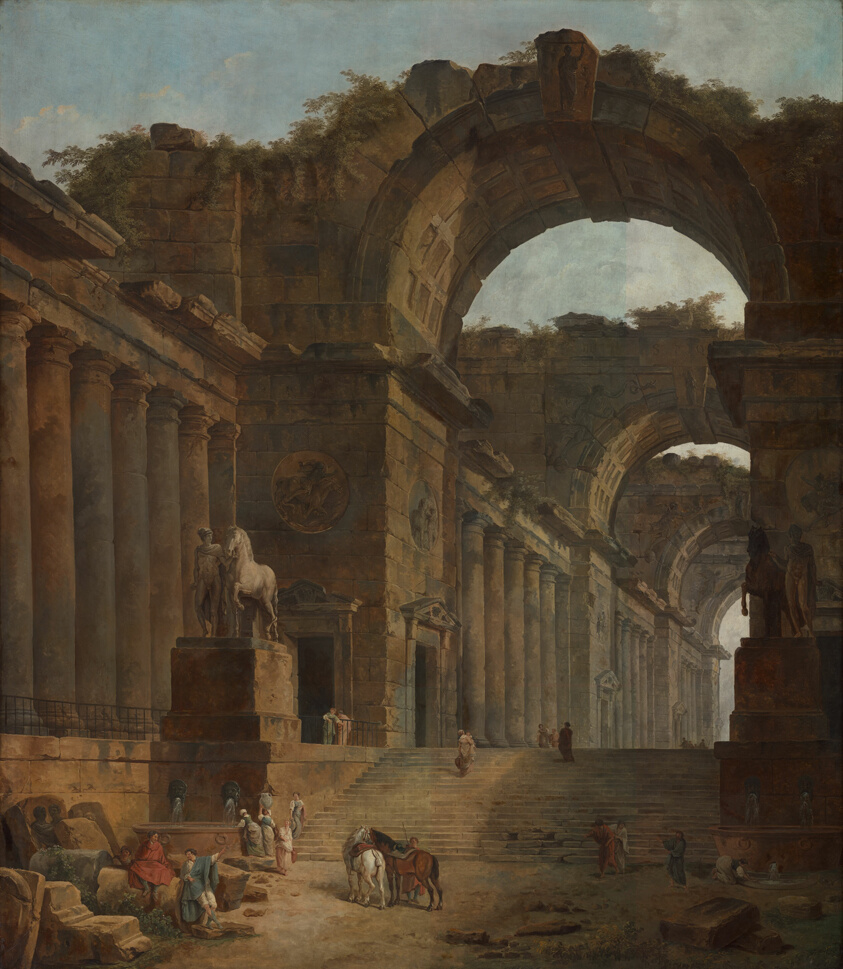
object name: Painting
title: The Fountains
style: Neoclassicism, 18th Century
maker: Hubert Robert (French, 1733-1808)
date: 1787/88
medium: Oil on canvas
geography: France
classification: oil on canvas; architecture; french; oil paintings (visual works); paint; painting; european painting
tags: ruins, architechture, architecture, architecture, classical, decoration, decorative, Italy, fountains, landscapes, Century of Progress, world's fairs, Chicago World's Fairs, monumental structures, equestrienne statues, horses, arches